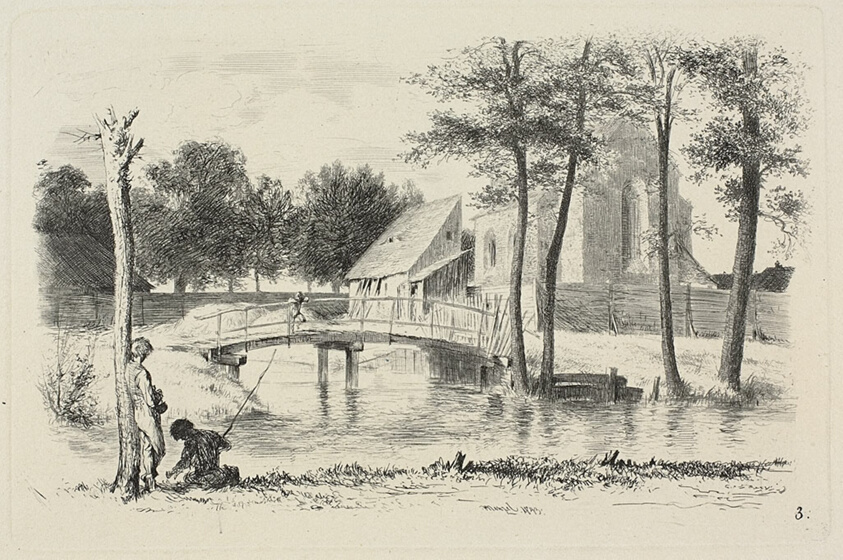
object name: Print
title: Plate three, from Radierversuche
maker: Adolph Menzel; German, 1815–1905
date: 1843, published 1844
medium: Etching in black on ivory wove paper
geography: Germany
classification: etching; print; prints and drawing